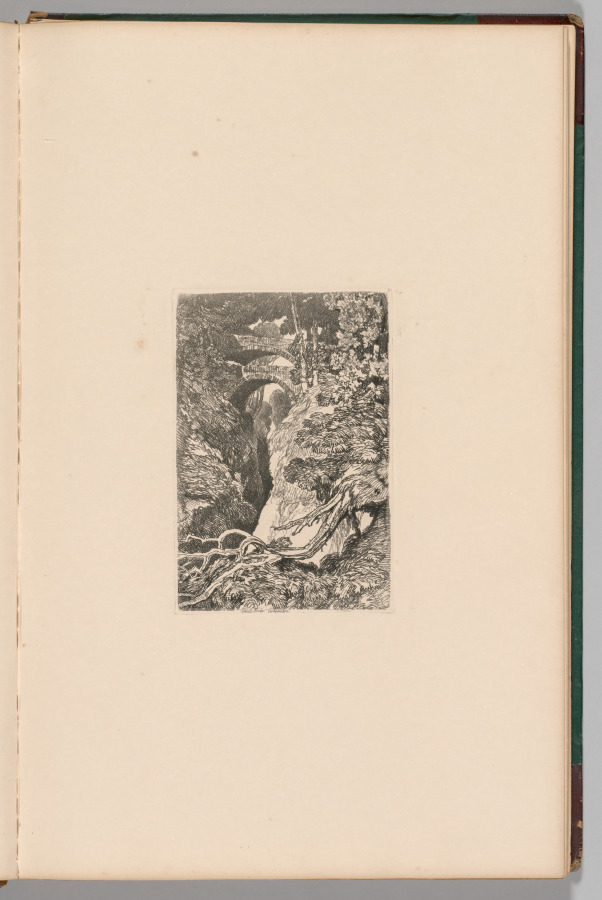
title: Liber Studiorum: Plate 10, The Devil's Bridge, Cardinganshire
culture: England, 19th century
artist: John Sell Cotman (British, 1782–1842)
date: 1838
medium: softground etching, from a bound volume containing 48 plates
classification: Bound Volume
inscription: In plate, within image, upper right: 10; in plate, partially within image, Devil's Bridge, Cardinganshire; in plate, below image, J S Cotman